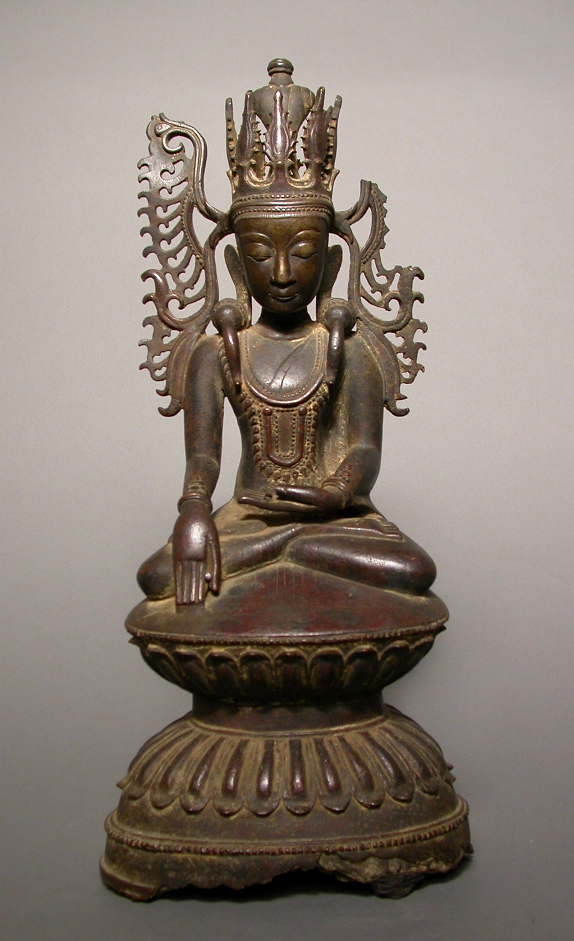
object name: Sculpture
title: Jeweled and Crowned Buddha (Jambupati)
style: Southeast Asian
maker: Burma (Myanmar)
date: c. 17th century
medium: Bronze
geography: Myanmar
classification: bronze; metal; sculpture; asian art